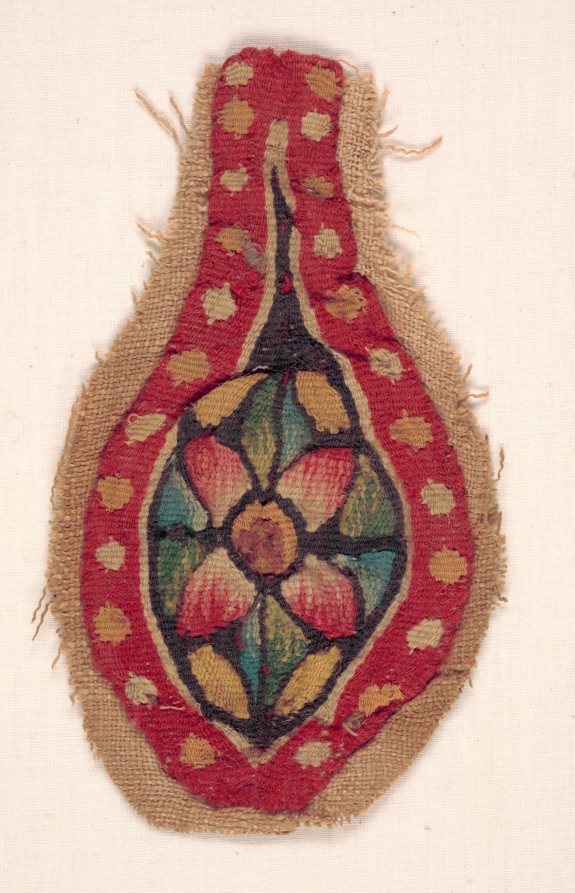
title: Ornament, Probably from a Tunic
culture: Egypt, Byzantine period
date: 400s - 500s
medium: tapestry weave: wool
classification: Textile